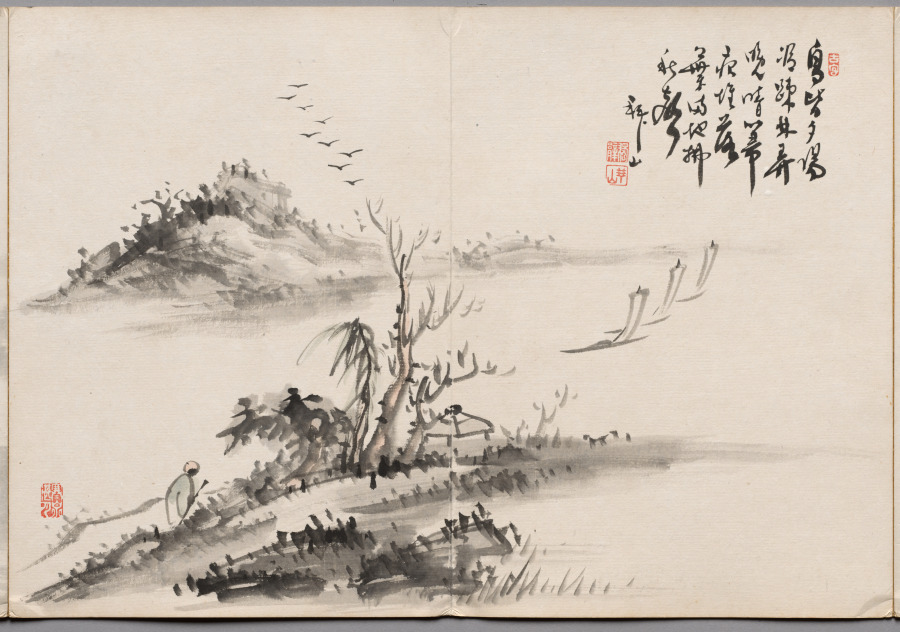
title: Painting Twelve from Album of Paintings by Haizan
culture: Japan, Meiji period (1868–1912) or Taishō period (1912–26)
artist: Yoshitsugu Haizan (Japanese, 1846–1915)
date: late 1800s–early 1900s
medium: page spread from double-sided accordion album; ink and color on paper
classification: Painting